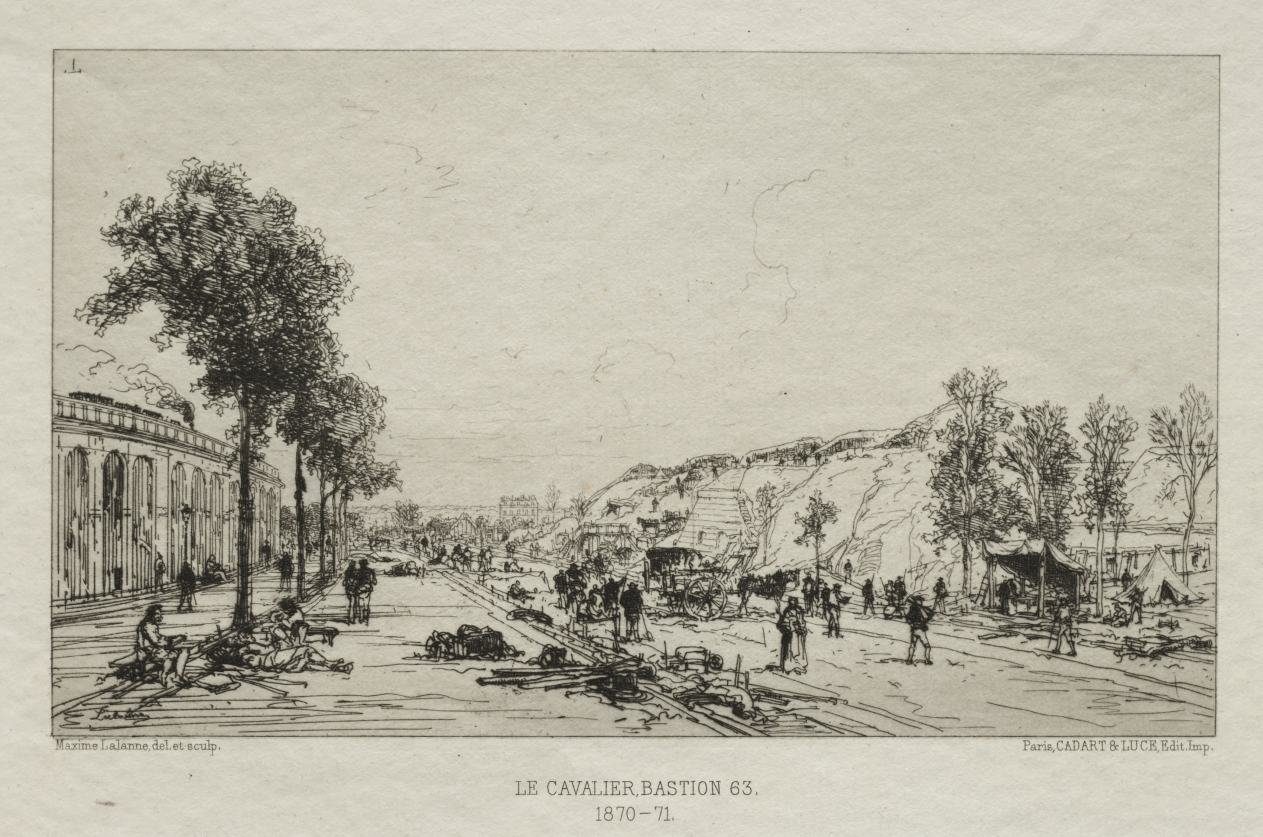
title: Souvenirs artistiques du Siège de Paris: Le Cavalie (Bastion 63)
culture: France, 19th century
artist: Maxime Lalanne (French, 1827–1886)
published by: Cadant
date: 1870–71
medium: etching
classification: Print